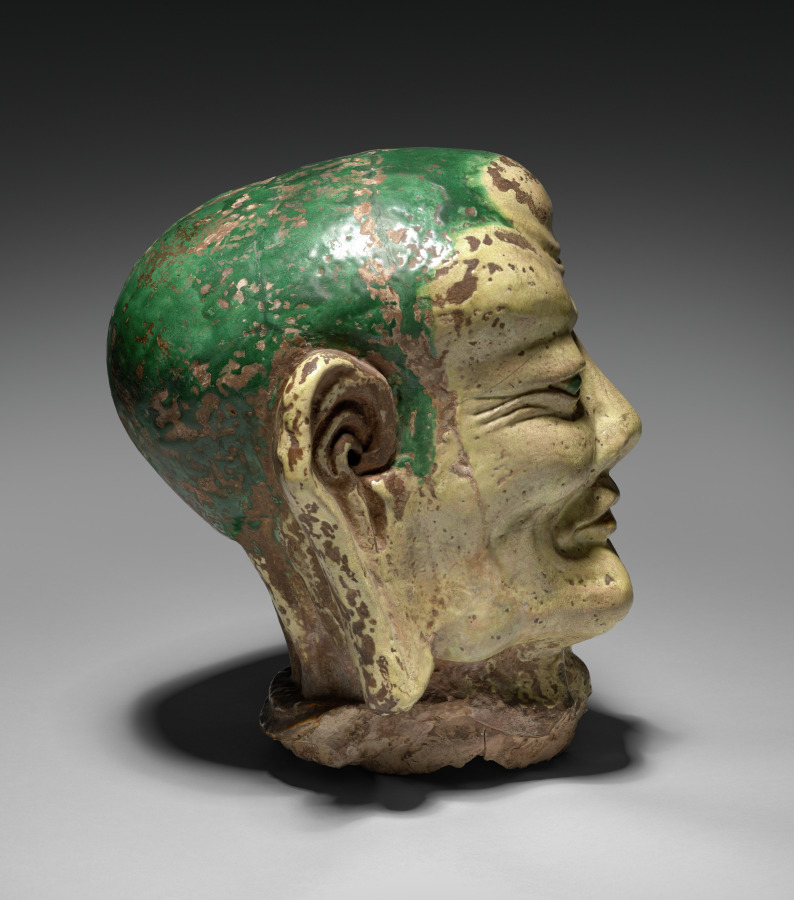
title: Head of a Lohan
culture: China, Ming dynasty (1368–1644)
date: 1368–1644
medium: earthenware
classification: Sculpture